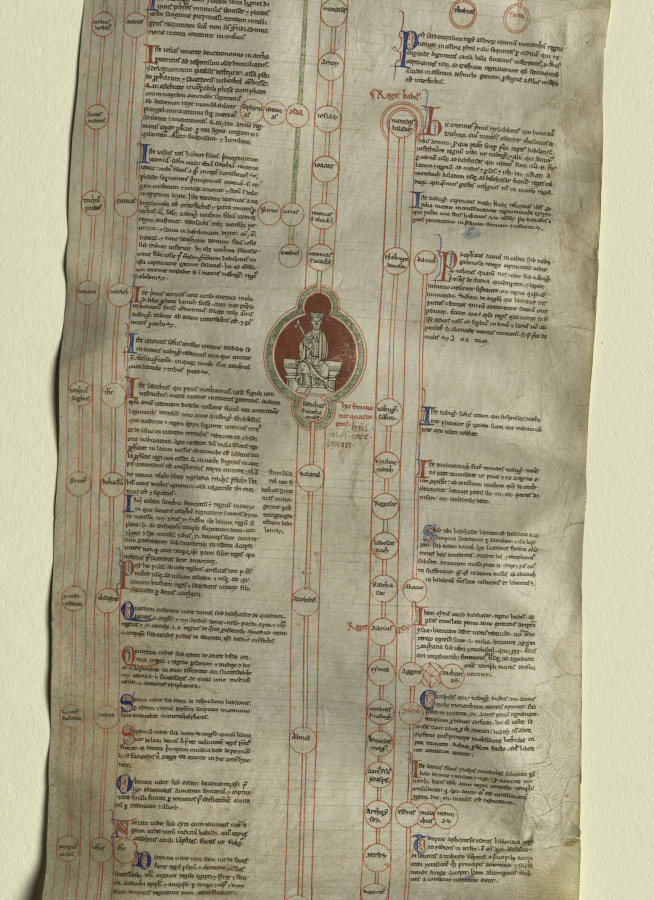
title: Peter of Poitiers's "Compendium Historiae in Genealogia Christi"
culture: England, Canterbury, 13th century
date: c. 1220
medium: ink and tempera on a vellum roll of four membranes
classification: Manuscript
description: This manuscript roll, composed of four membranes formerly stitched together in a continuous roll about nine feet long, has been divided in the middle for easier visibility and study. The text is an abridgment of biblical history focused on the descent of Christ from Adam. It was written by Peter of Poitiers (about 1130–1205), who taught theology and history in Paris and was widely copied. The present roll is an English copy of Peter's text made shortly after his death. Although manuscript rolls were hung on the walls of a classroom as instructional aids to students, some of them have value beyond their textual and historical interest because of the fine quality of their drawings, as seen here. A comparison with Canterbury manuscripts and stained glass of around 1220 is the basis for the attribution to Canterbury. Peter of Poitiers's aim in this project was to assist students prevented from mastering biblical history because of its length and because they were too poor to own books. His text on roll is the briefest possible summary of biblical history. It is arranged in six historical stages, denoting the six ages of the world, as decreed by theological tradition. The first five ages were inaugurated by Old Testament individuals: Adam, Noah, Abraham, David, and Sedecias. The birth of Christ heralded the sixth stage. Beginning at the top of the first membrane, the text consists of brief biographical entries on the ancestors of Christ (Adam, Noah, Abraham, Moses, and David) and other biblical personalities. These extend to the birth of Christ on the fourth membrane, ending with accounts of Hebrew and Roman kings and the Apostles. Each compendium shows the names of the ancestors inscribed within circles, those of direct descent placed vertically in a central column, others scattered in clusters to the right and left. The decoration of the roll consists of a series of medallions of diverse geometrical frames filled with either a figural drawing or a diagram. The style of these pen-and-ink drawings, some illuminated in tempera or tinted with wash, stems from English manuscript and glass painting attributed to the school of Canterbury Cathedral. The style of the museum's illustrations is so close to the stained glass panels made for Trinity Chapel at Canterbury (about 1220) to suggest that an artist active as a glazier in the Cathedral workshop may also have executed the manuscript. In the least, the painter of the roll manuscript was familiar with the style of the painted glass, and on this basis, a date of about 1220 seems appropriate. Additional evidence is supplied by a psalter illuminated at Canterbury shortly before 1220. The figurative scenes in this psalter were apparently illustrated by the same hand that executed the line and wash drawings in the museum's roll.